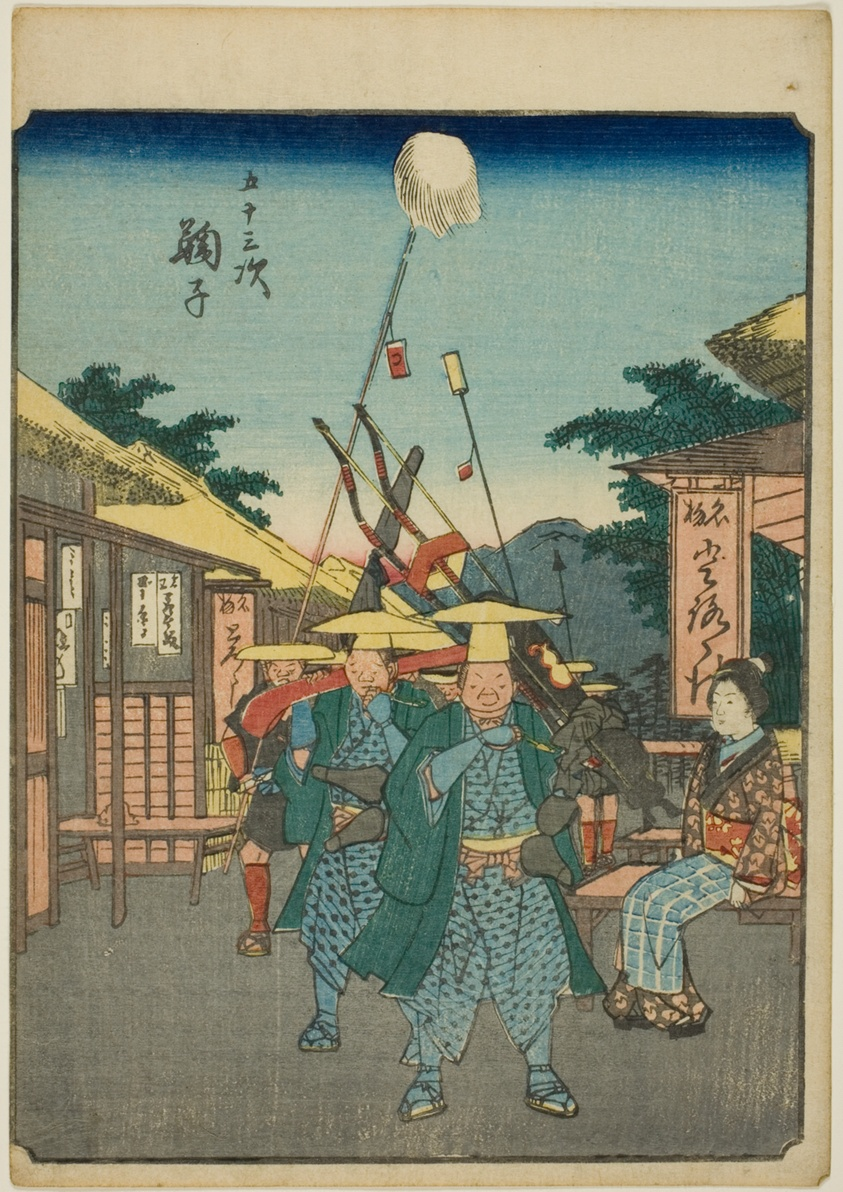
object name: Print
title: Mariko, from the series "Fifty-three Stations [of the Tokaido] (Gojusan tsugi)," also known as the Figure Tokaido (Jinbutsu Tokaido)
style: Japanese (culture or style)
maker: Utagawa Hiroshige 歌川 広重; Japanese, 1797-1858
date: 1852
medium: Color woodblock print; chuban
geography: Japan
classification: woodblock print; print